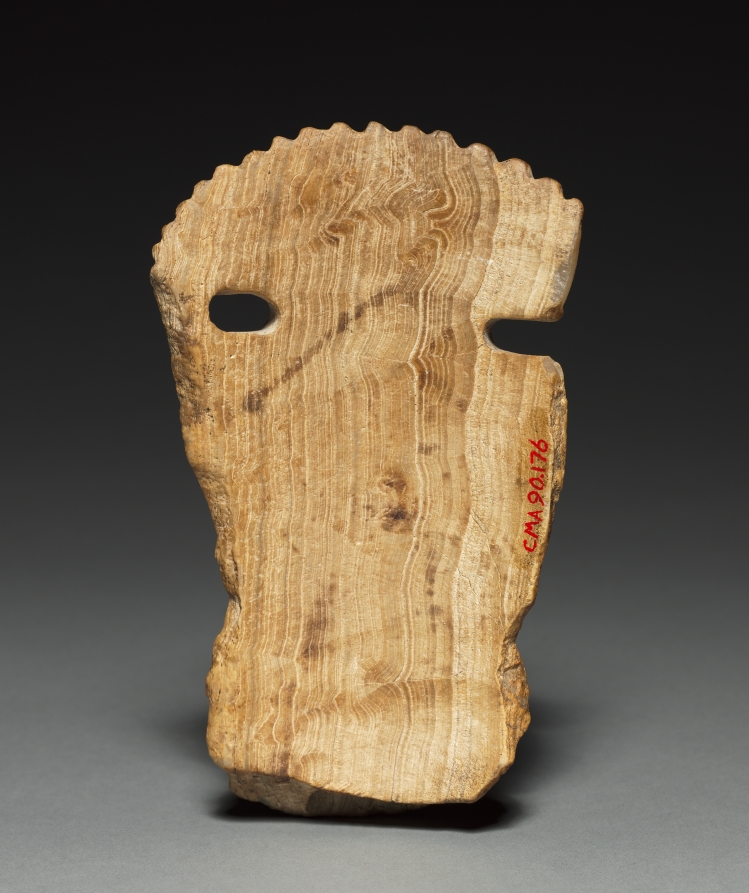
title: Vessel Fragment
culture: Mexico, Aztec style, 20th century (?)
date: 20th Century?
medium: banded travertine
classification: Sculpture